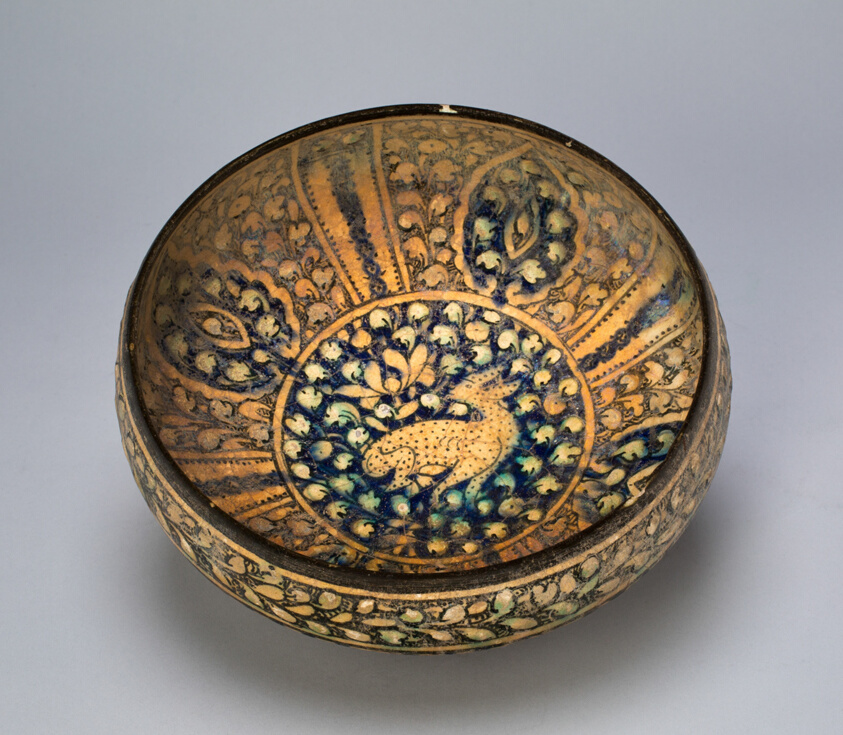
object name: Ceramics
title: Bowl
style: sultanabad, Islamic (culture or style)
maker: Iran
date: Ilkhanid Dynasty (1256–1353) , Late 13th/early 14th century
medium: Fritware with underglaze-painted decoration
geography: Soltanabad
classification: bowl; dish (vessel); asian art; ceramics; vessel